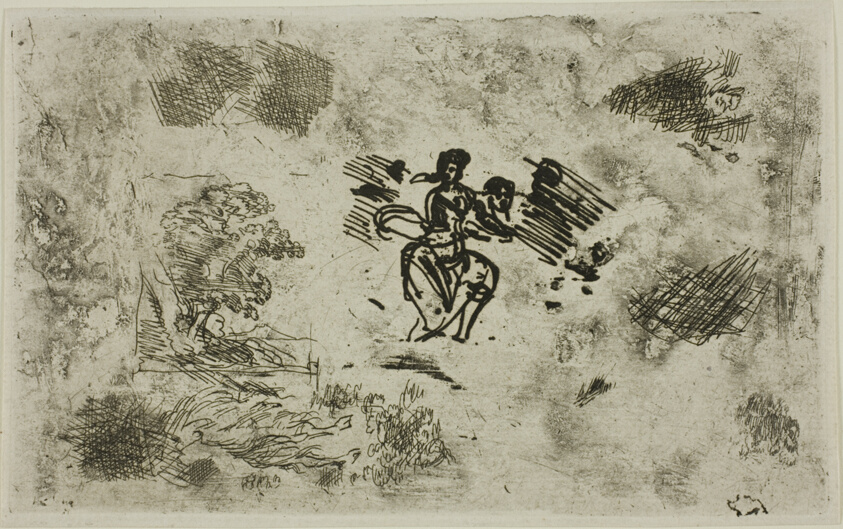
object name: Print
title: Seated Woman and Other Sketches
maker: Claude Lorrain (French, 1600-1682)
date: 1630/33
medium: Etching on ivory laid paper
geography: France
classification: etching; print; prints and drawing